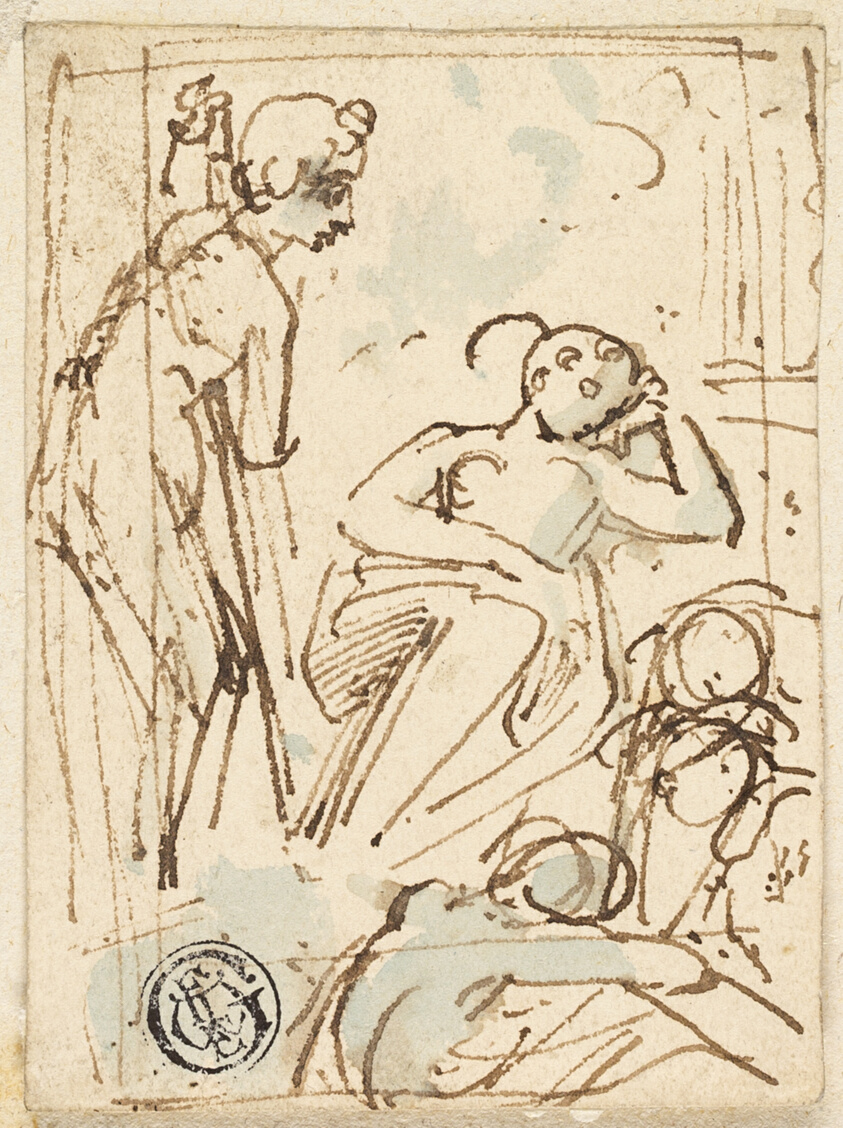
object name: Drawing and Watercolor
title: Sketch of Man Leaning on Staff, Looking at Sleeping Woman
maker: Attributed to Thomas Stothard; English, 1755-1834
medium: Pen and brown ink with brush and blue wash, on cream wove paper, tipped onto cream wove paper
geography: England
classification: pen and ink drawings; drawings (visual works); prints and drawing